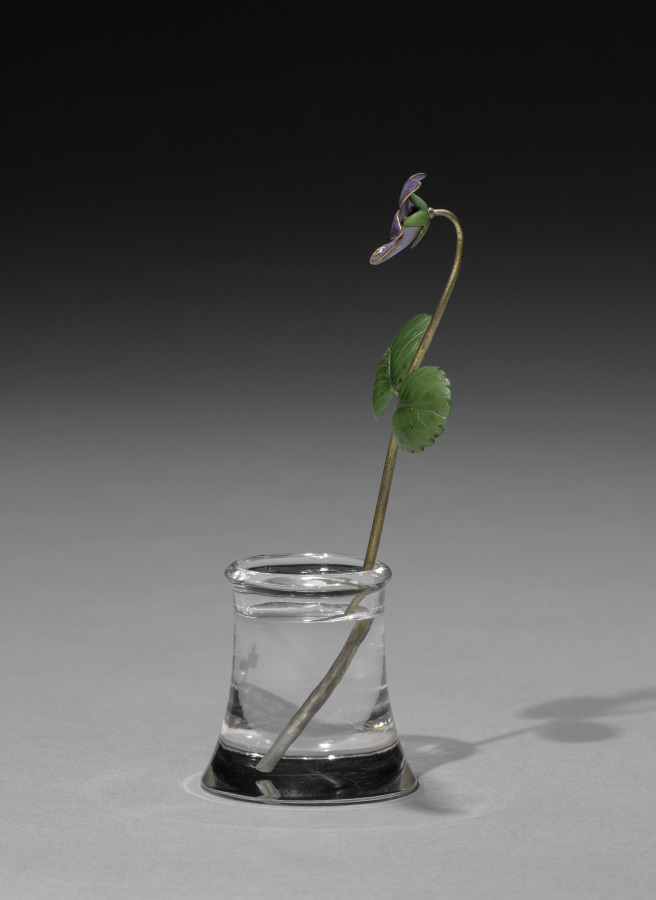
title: Flower Study of a Violet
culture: Russia, St. Petersburg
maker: House of Fabergé (Russian, 1842–1918)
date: c. 1885–1915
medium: enamel, silver gilt, jade, diamond, rock crystal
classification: Miscellaneous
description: This flower study depicts a single stem of violet. Fabergé’s inspiration for his flower studies is said to have come from the floral brooches of precious stones that were made in the 1700s for Catherine the Great as well as from the Japanese art of flower arranging, known as ikebana. Small and delicate, Fabergé’s flower studies were given as intimate gifts to friends by the tsarina and others in the court. She also liked to take them around to wherever the imperial family was residing as a reminder of spring during the harsh Russian winters.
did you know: The stems of Fabergé’s flower studies are set into little basins carved from rock crystal to resemble pots of water.